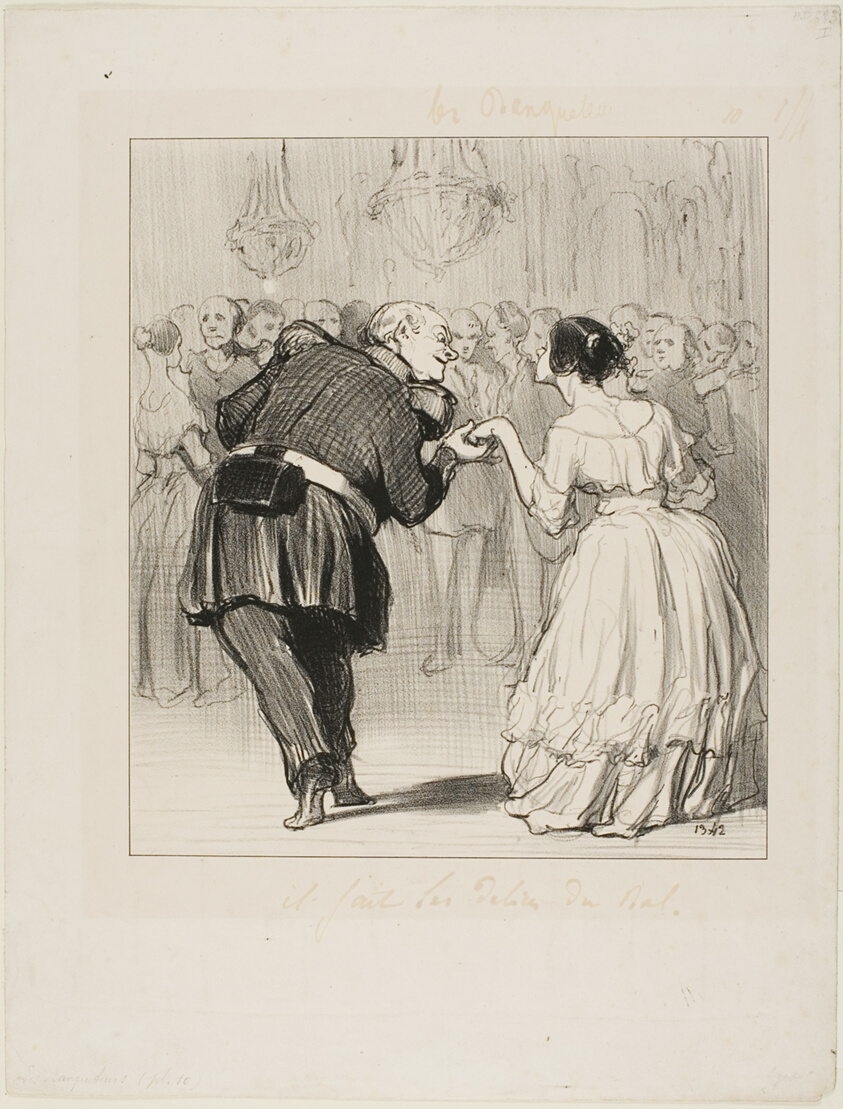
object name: Print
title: He delights in the ball, plate 10 from Les Banqueteurs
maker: Honoré Victorin Daumier (French, 1808-1879); printed by Aubert & Cie. (French, active 19th century)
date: 1849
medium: Lithograph in black on white wove paper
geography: France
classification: lithograph; print; prints and drawing